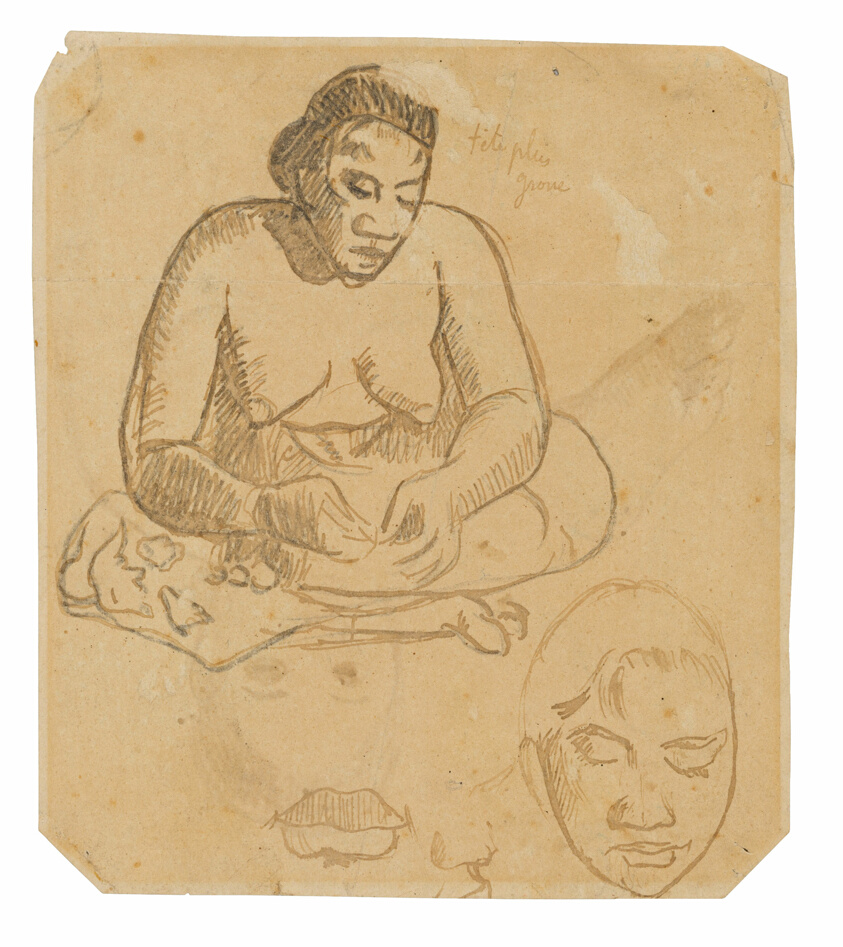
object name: Drawing and Watercolor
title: Seated Tahitian Woman (recto); Standing Tahitian Woman (verso)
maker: Paul Gauguin (French, 1848-1903)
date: 1891/93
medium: Pen and brown ink (originally purple, est.), with graphite, on cream wove paper (recto); pen and brown ink (originally purple, est.), with traces of graphite, on cream wove paper; removed from a sketchbook and trimmed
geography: France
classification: pen and ink drawings; drawings (visual works); prints and drawing